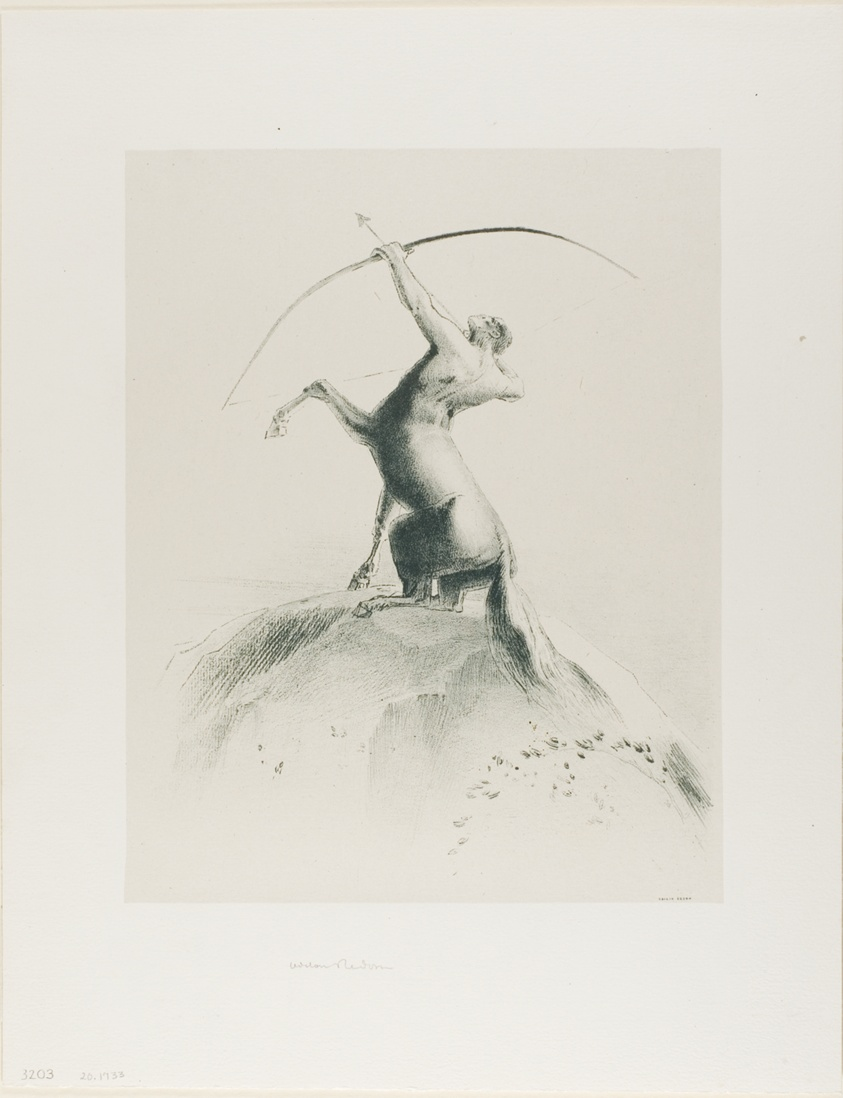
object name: Print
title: Centaur Aiming at the Clouds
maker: Odilon Redon (French, 1840-1916)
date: 1895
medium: Lithograph printed in green on cream China paper laid down on ivory wove paper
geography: France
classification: lithograph; print; prints and drawing; paper